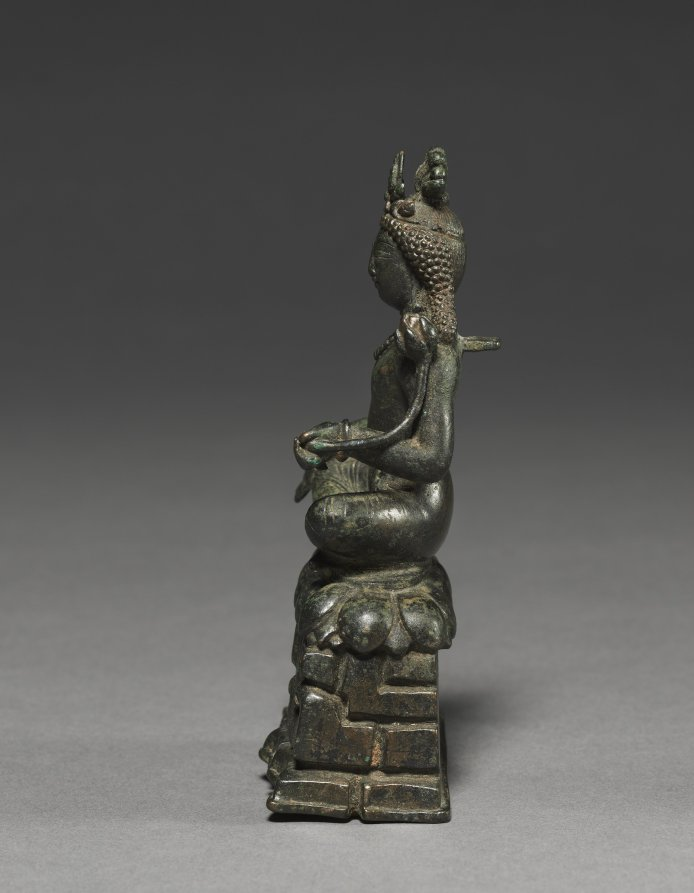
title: Padmapani Lokeshvara Seated on the Rock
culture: India, Kashmir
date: 700s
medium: bronze with silver overlay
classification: Sculpture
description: Though diminutive, this image conveys a monumental power through the intense expression particular to Kashmiri art. He sits alert in yogic concentration on a lotus pedestal that exists miraculously in a rocky wilderness. His left hand holds the stem of a lotus flower—the main attribute of this bodhisattva of compassion. His generously sized right hand with fleshy palm is in the gift-giving gesture. The tiny figure of Amitabha, the Buddha who sits in meditation in his crown, identifies the image as Avalokiteshvara.